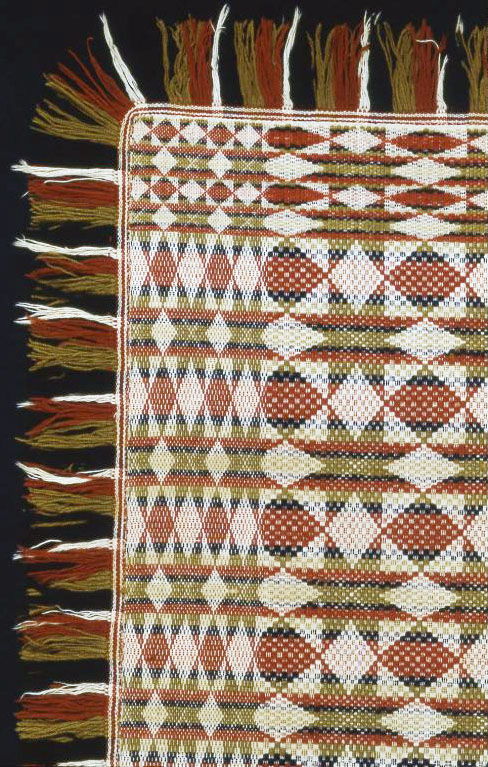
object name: Textile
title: Coverlet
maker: United States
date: 1820s/30s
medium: Cotton and wool, plain weave with supplementary patterning wefts (overshot); edged with plain weave with extended ground weft fringe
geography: United States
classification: weaving - coverlet; coverlet; textile; weaving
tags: geometric motif, coverlet, diamond shapes, stars